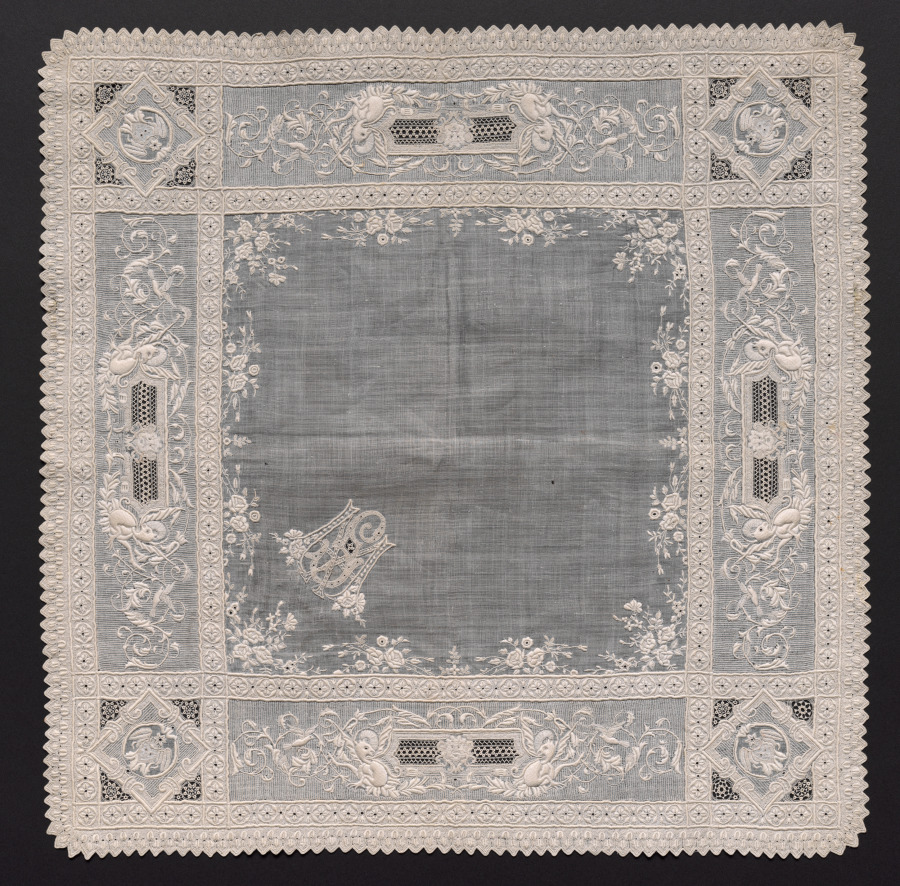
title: Lace Handkerchief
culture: France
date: 1800–1820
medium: Plain weave linen center: needle lace (drawnwork) and embroidery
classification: Embroidery